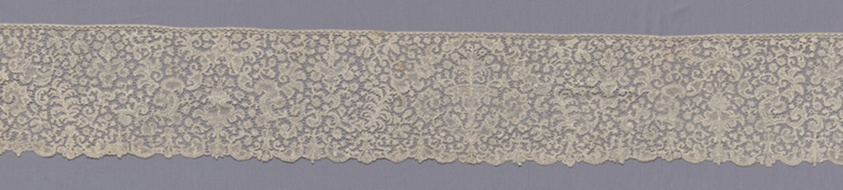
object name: Textile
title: Lace Flounce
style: 18th Century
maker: Flanders, Brussels (present day Belgium)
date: 1701-25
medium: Linen, bobbin part lace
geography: Flanders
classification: textile; lace - bobbin; lace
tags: fountains, cartouches, arabesque, vines